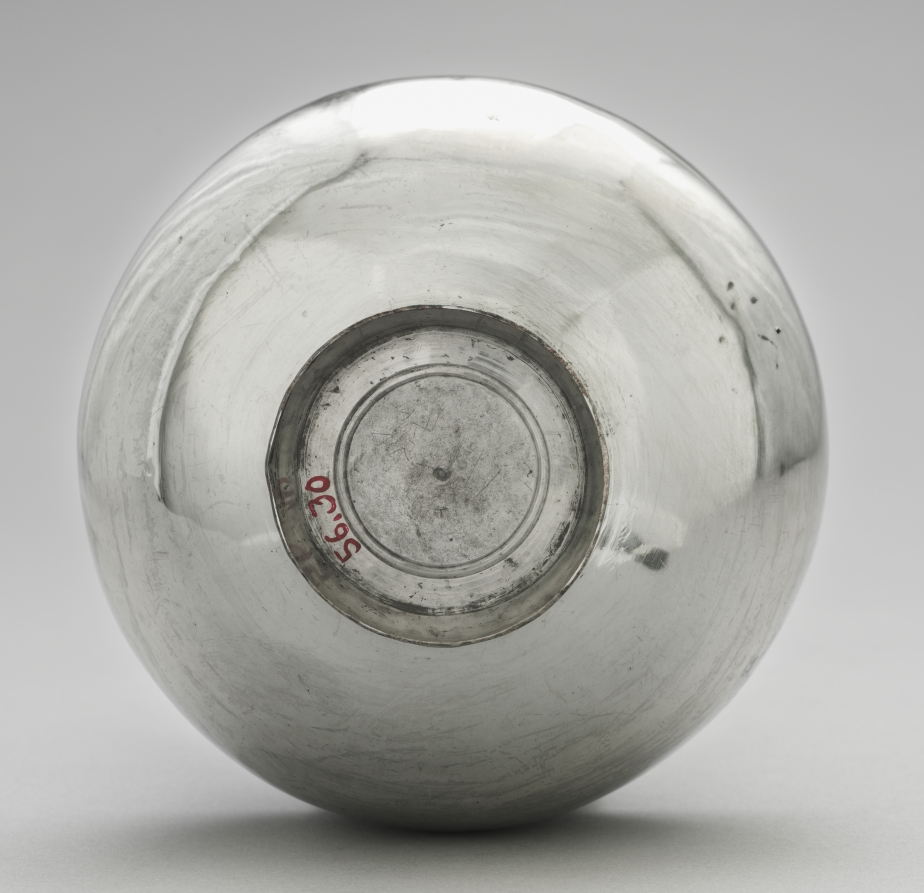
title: Bowl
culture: Byzantium, Syria(?), Byzantine period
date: 350–450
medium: silver with niello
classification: Metalwork